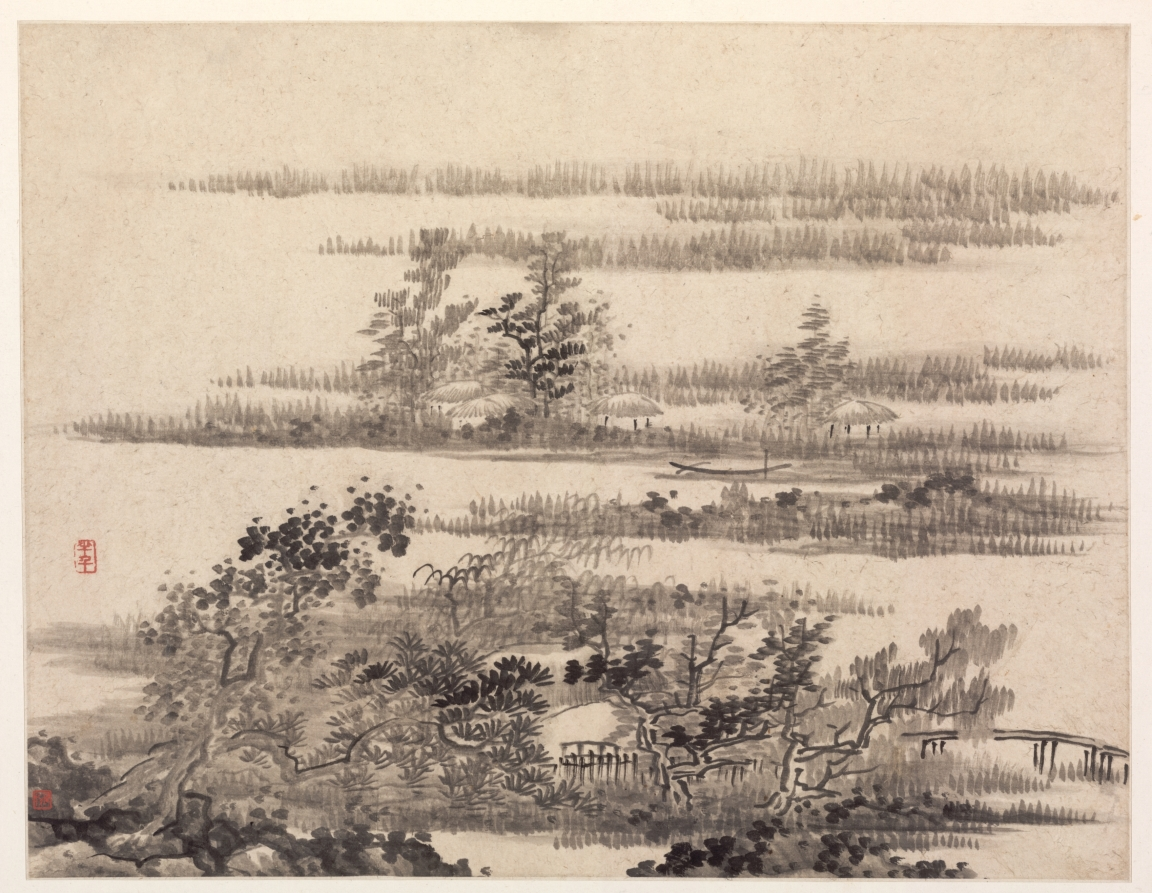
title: Summer in the Water Country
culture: China, Qing dynasty (1644-1911)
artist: Gong Xian (Chinese, 1599–1689)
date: 1670s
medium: Album leaf; ink on paper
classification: Painting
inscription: Artist's seal: Ban qian 半千. 1 additional seal unidentified.